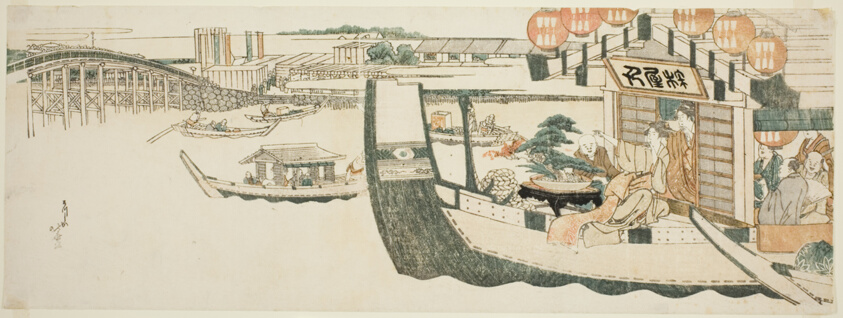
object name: Print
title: Boating parties on the Sumida River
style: Japanese (culture or style)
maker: Katsushika Hokusai 葛飾 北斎; Japanese, 1760-1849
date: c. 1808/12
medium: Color woodblock print; nagaban, surimono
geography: Japan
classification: woodblock print; print; asian art